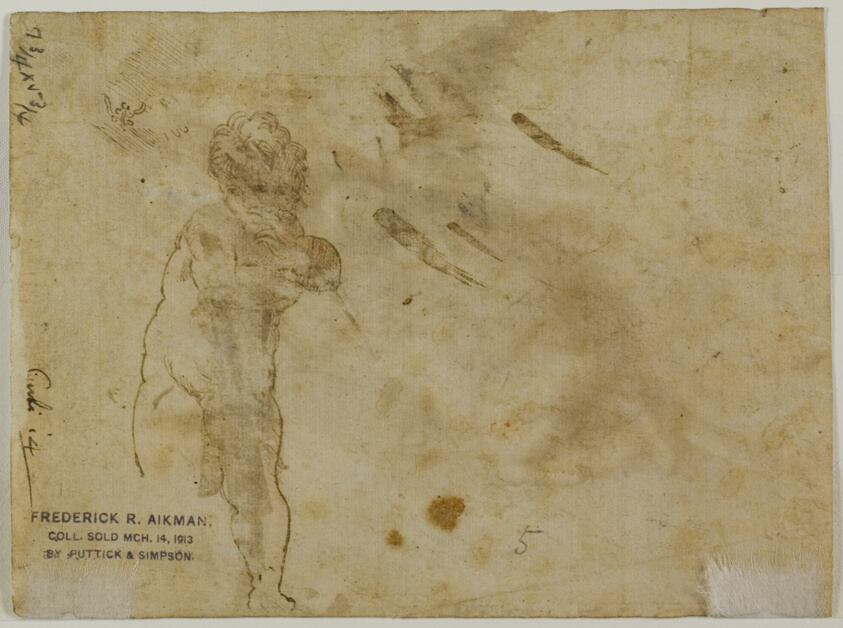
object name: Drawing and Watercolor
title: Infant Hercules (recto); Standing Putto with Hand to Chin (verso)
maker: Follower of Francesco Mazzola, called Parmigianino; Italian, 1503-1540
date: 1523/1540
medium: Pen and brown ink with brush and brown wash (recto), and pen and brown ink with traces of red chalk (verso), on tan laid paper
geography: Italy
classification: ink with wash; drawings (visual works); prints and drawing